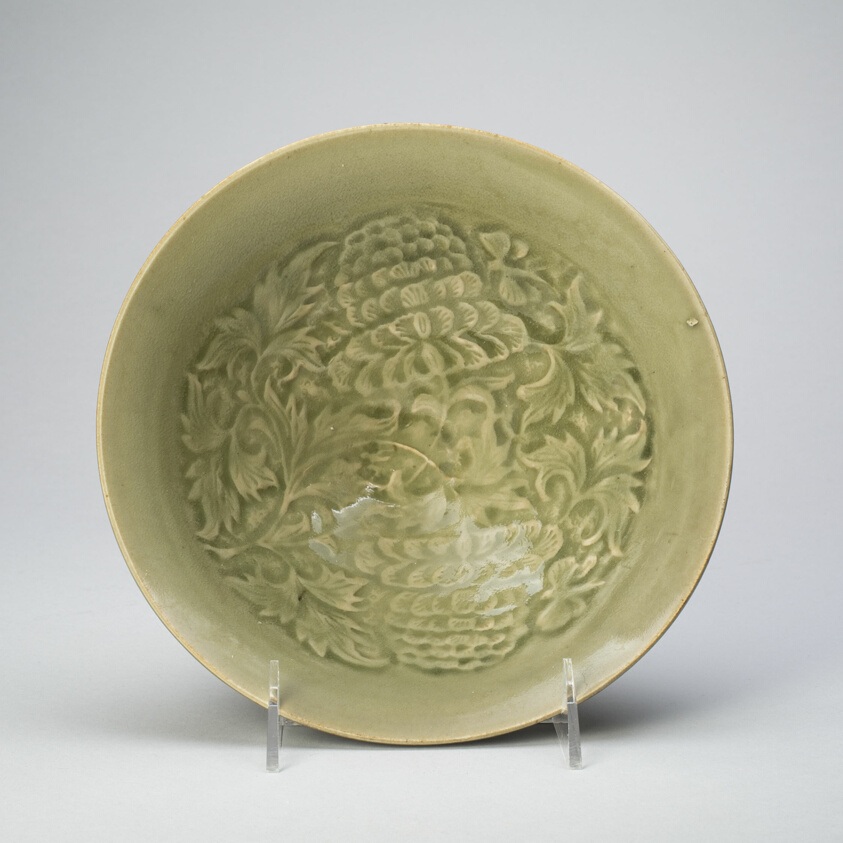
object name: Vessel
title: Conical Bowl with Peony Scroll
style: Chinese (culture or style)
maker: China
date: Jin dynasty, (1115–1234), early 12th century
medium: Yaozhou ware; stoneware with underglaze molded decoration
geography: China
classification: bowl; stoneware; dish (vessel); asian art; ceramics; vessel